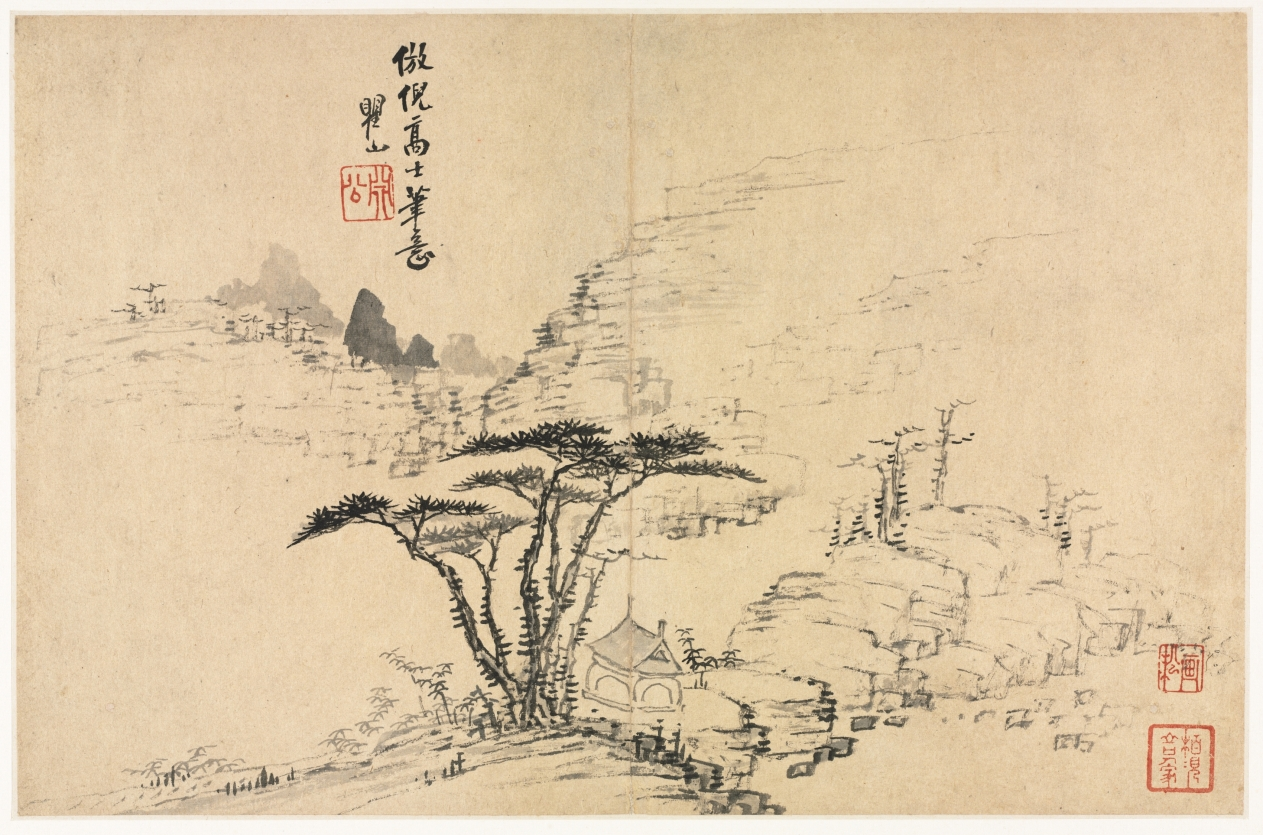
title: Landscapes in Various Styles after Old Masters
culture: China, Qing dynasty (1644-1911)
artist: Mei Qing (Chinese, 1623–1697)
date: 1690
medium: album leaf: ink and color on paper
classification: Painting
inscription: Winter Leaf I (formerly Leaf E). Artist's inscription, signature, and seals: Imitating Ni Gaoshi's [Ni Zan] brush idea. Qushan [seal] Yuangong. [2 seals, lower right corner] Huasong; Bo jian shan kou ren jia.